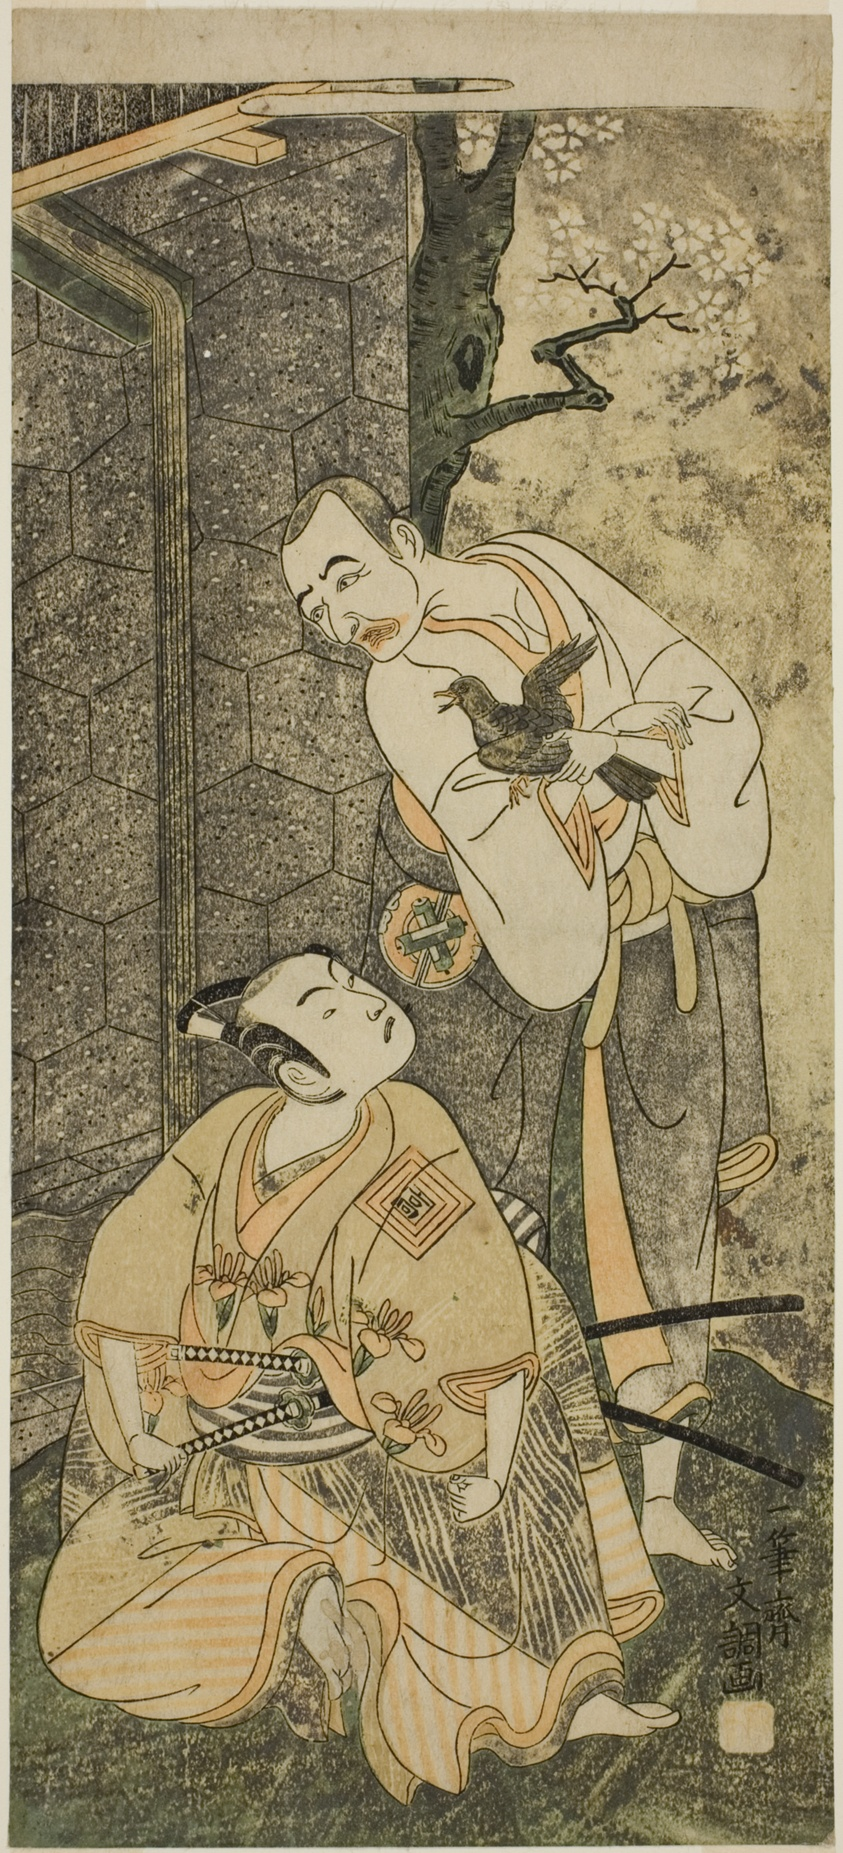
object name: Print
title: The Actors Nakamura Utaemon I as Seigen (right), and Ichikawa Komazo II as Shimizu Tonoinosuke Kiyoharu (left), in the Play Soga Moyo Aigo no Wakamatsu, Performed at the Nakamura Theater in the Third Month, 1769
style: Japanese (culture or style)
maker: Ippitsusai Buncho (Japanese, active c. 1755-90)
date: c. 1769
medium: Color woodblock print; hosoban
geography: Japan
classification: woodblock print; print; asian art